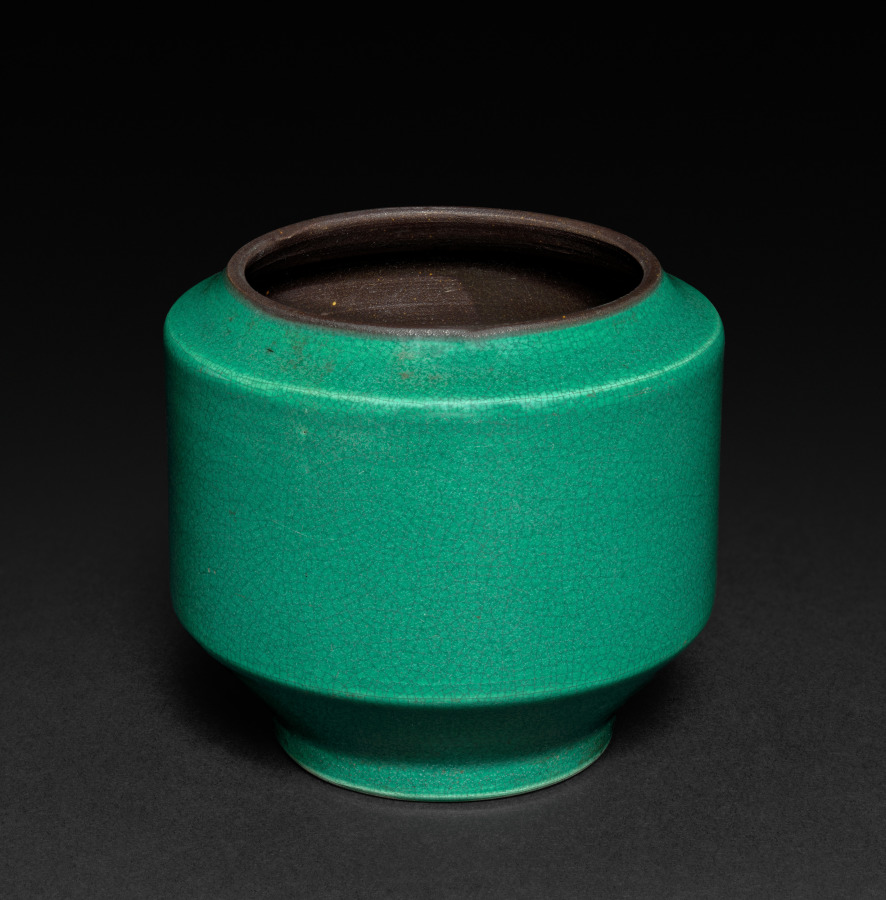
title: Camellia-Leaf-Green Cylindrical Vase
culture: China, Qing dynasty (1644-1911), Kangxi reign (1661-1722)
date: 1661–1722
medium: porcelain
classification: Ceramic